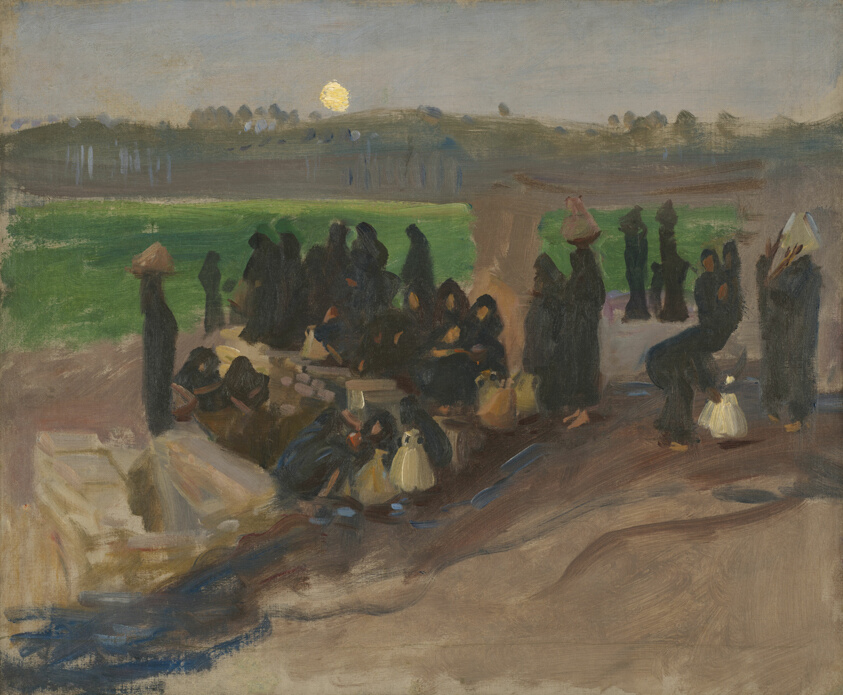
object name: Painting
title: Water Carriers on the Nile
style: Modernism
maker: John Singer Sargent (American, 1856–1925)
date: 1891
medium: Oil on canvas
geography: United States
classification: painting; american arts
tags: Chicago